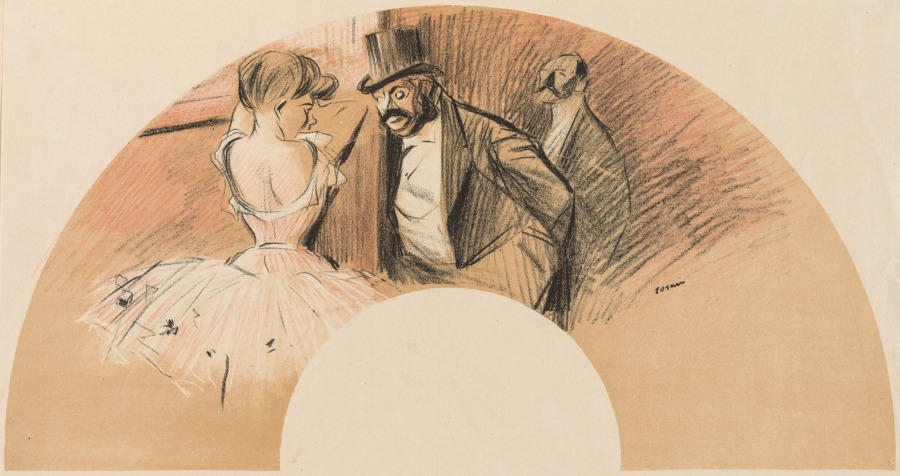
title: Bal Gavarni Fan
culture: France, 19th-20th century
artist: Jean Louis Forain (French, 1852–1931)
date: 1903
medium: lithograph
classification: Print